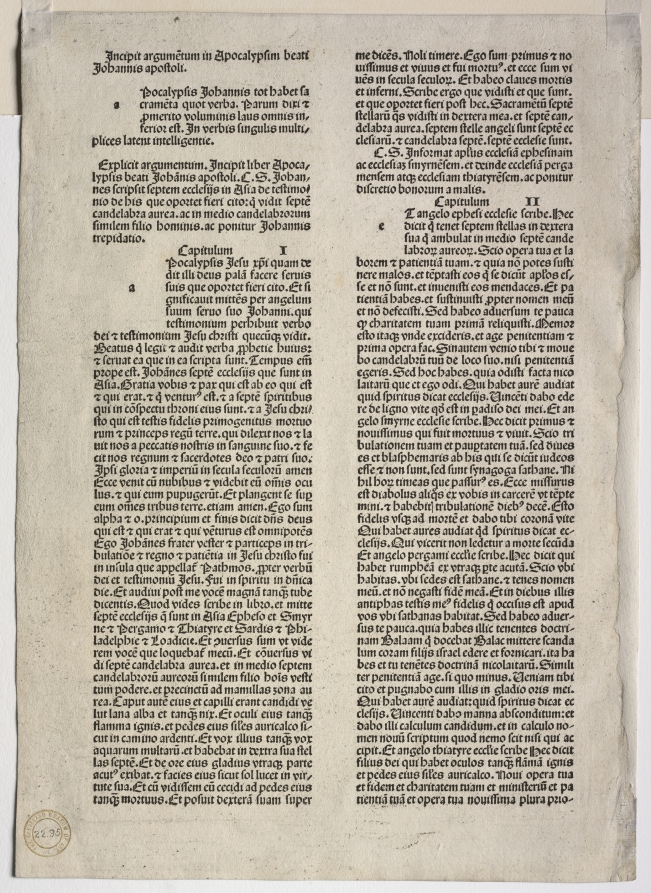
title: Revelation of St. John: Martyrdom of St. John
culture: Germany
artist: Albrecht Dürer (German, 1471–1528)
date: 1511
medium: woodcut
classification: Print